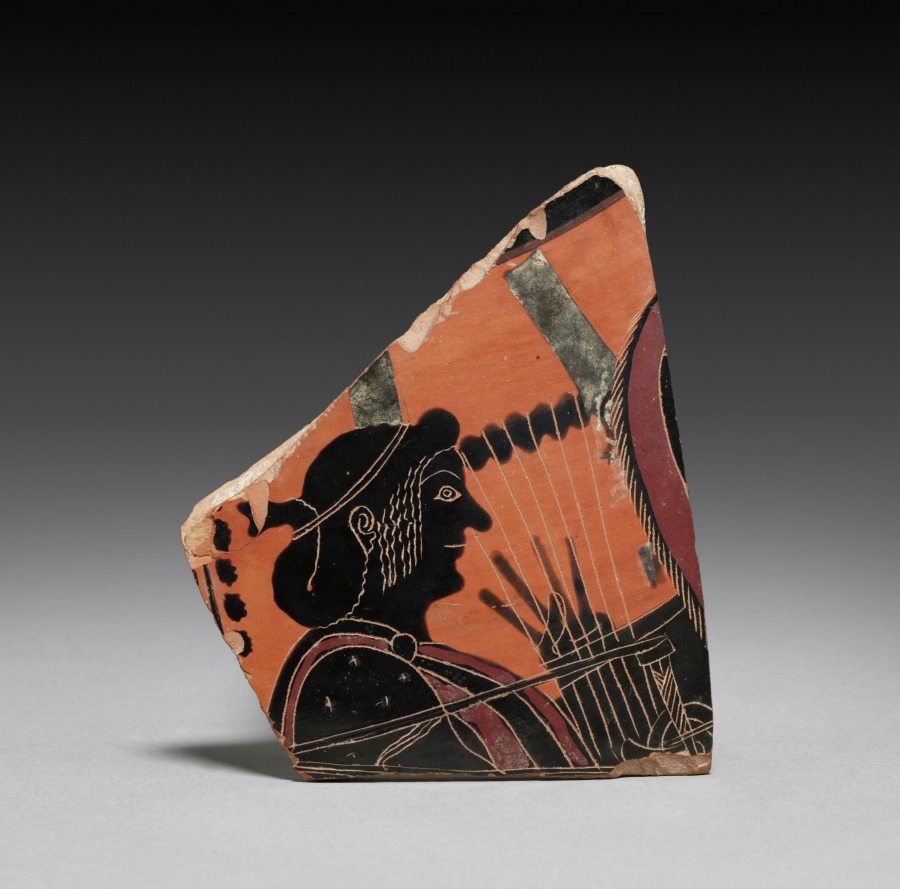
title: Fragment from Black-Figure Neck-Amphora of Panathenaic Shape (Storage Vessel): Apollo with Lyre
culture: Greek, Attic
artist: manner of Antimenes Painter (Greek, Attic, active c. 530–510 BCE)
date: c. 520 BCE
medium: ceramic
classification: Ceramic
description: With so little preserved, the precise subject once shown on this vase remains uncertain. Along with Apollo playing his lyre, parts of the mane and reins of a horse remain, suggesting a chariot procession—perhaps for the wedding of Peleus and Thetis, an event attended by the Olympian gods.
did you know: Although only two fragments survive from this vase, both show Apollo, here playing his lyre.